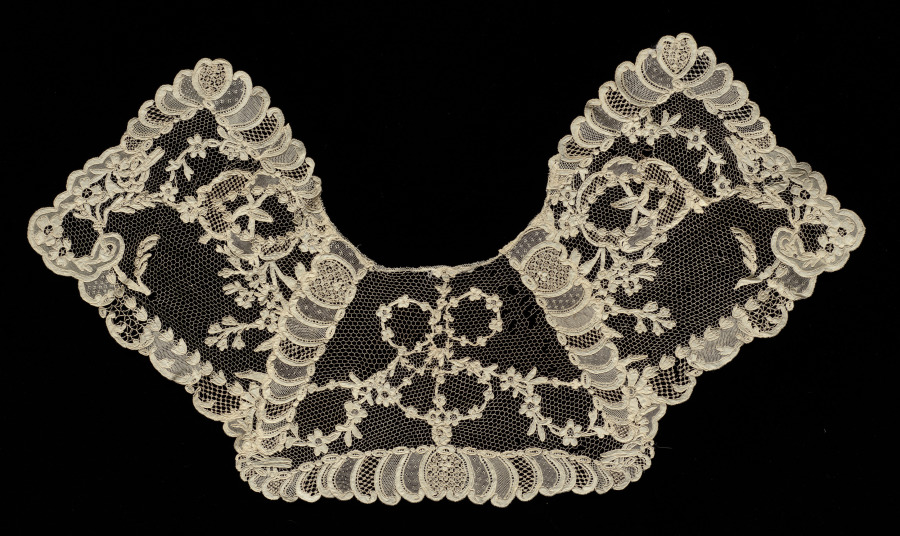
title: Lace Collar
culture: France, Argentan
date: 1700s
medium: Linen: needle lace (Point de Argentan)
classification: Lace